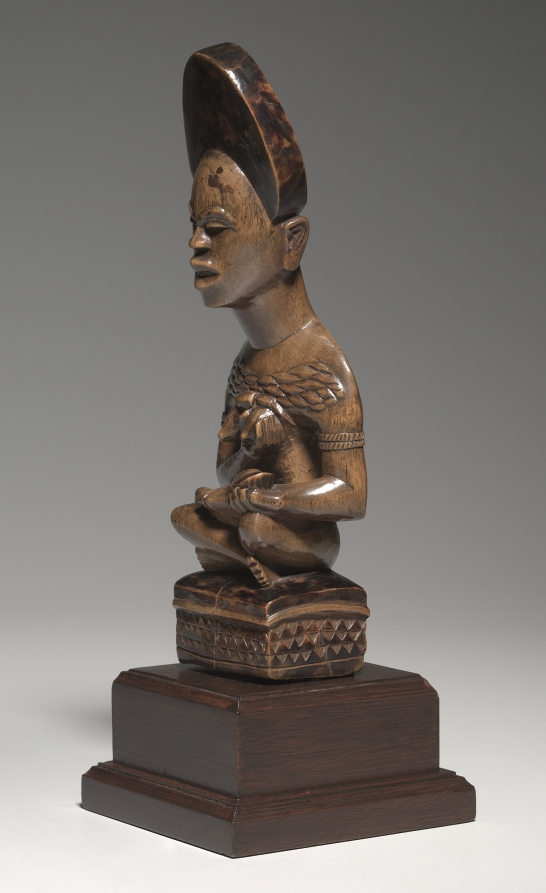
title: Woman and Child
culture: Africa, Central Africa, Democratic Republic of Congo, Yombe-style carver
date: mid- to late 1800s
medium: Wood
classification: Sculpture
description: This mother-and-child figure was probably part of a cult concerned with the treatment of infertility. Both her jewelry and her seated pose indicate that the woman occupied a high rank in her community. Her miter-shaped hairstyle, chiseled teeth, and raised body scars--considered to be marks of beauty and perfection--signal that the woman incarnates the founding ancestor of a kinship group.